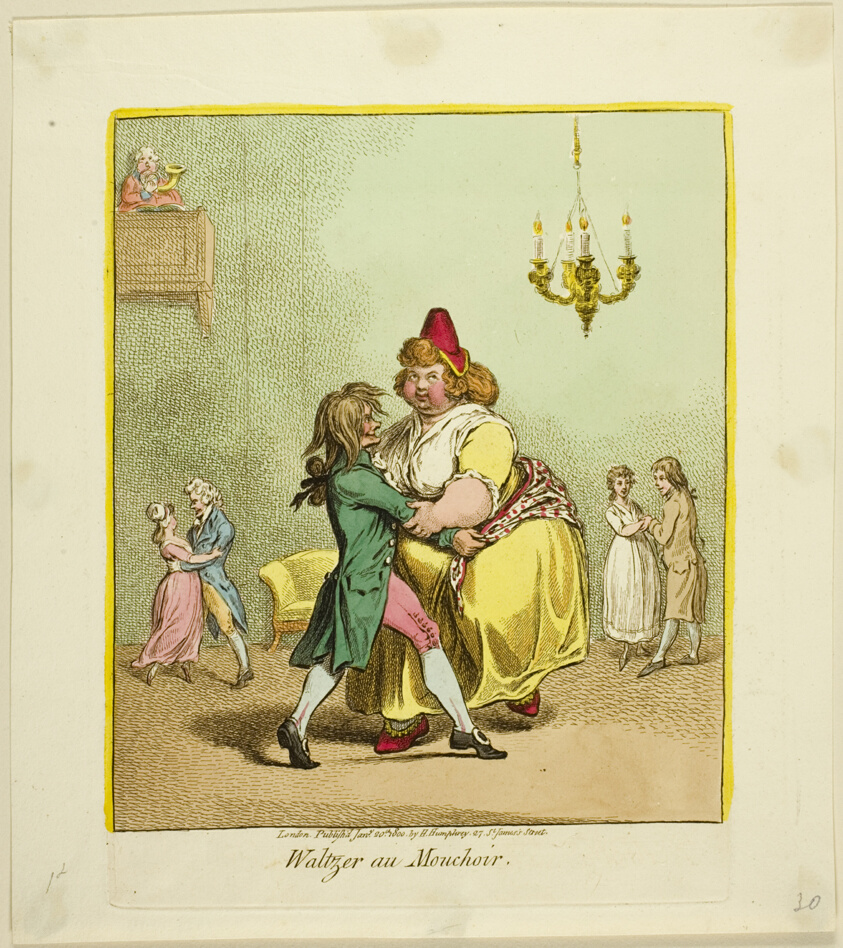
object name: Print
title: Waltzer au Mouchoir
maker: James Gillray (English, 1756-1815); published by Hannah Humphrey (English, c. 1745-1818)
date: published January 20, 1800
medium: Hand-colored etching on paper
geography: England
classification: etching; print; prints and drawing